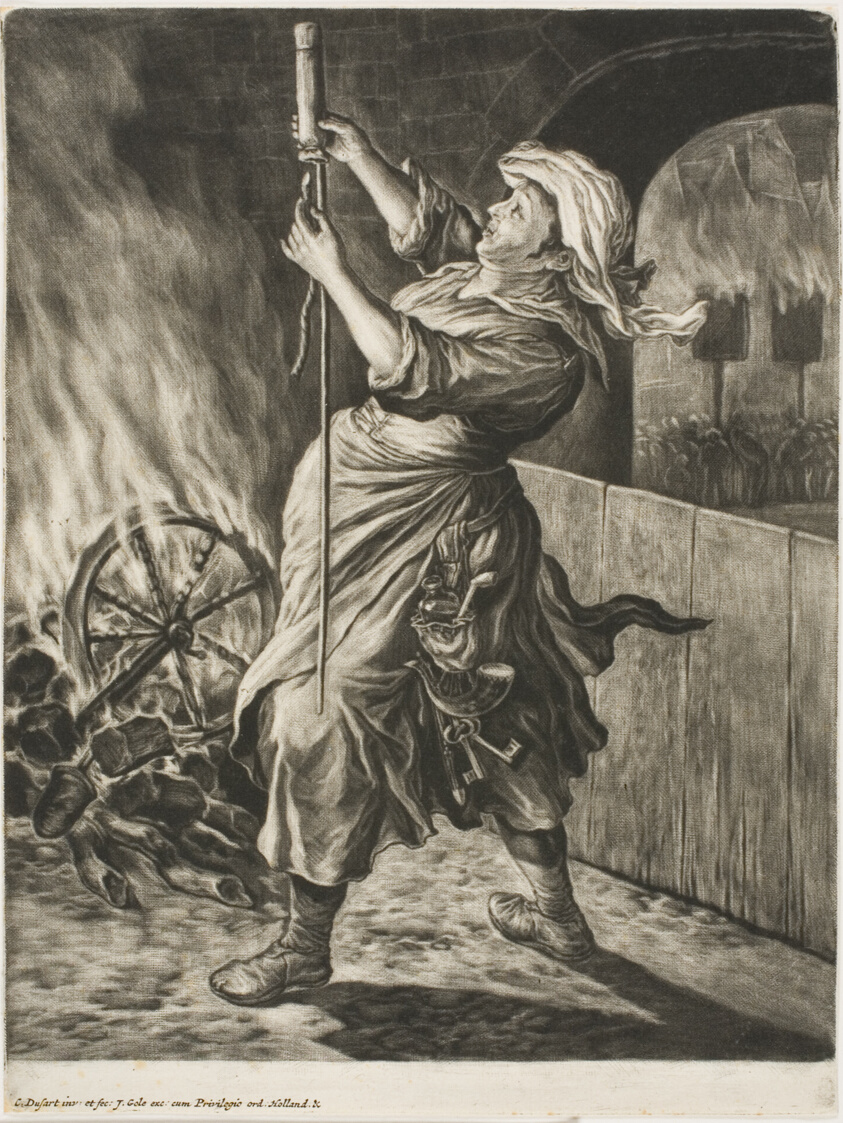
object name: Print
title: Woman Lighting a Rocket, also called Peace Gets Me Going, from Communia Gaudia (The Wide-Spread Rejoicing at the Siege of Namur)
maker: Cornelis Dusart (Dutch, 1660-1704); published by Jacob Gole (Dutch, 1660-1737)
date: 1695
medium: Mezzotint in black on ivory laid paper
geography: Holland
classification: mezzotint; print; prints and drawing